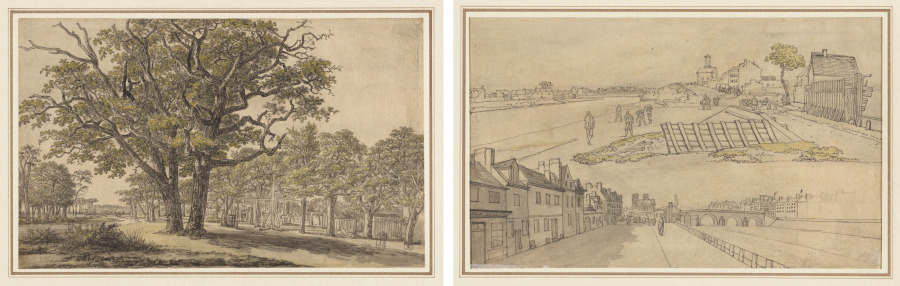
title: Landscape (recto) Two Views of Paris (verso)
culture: France, 19th century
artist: Georges Michel (French, 1763–1843)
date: first half 1800s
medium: pen and black ink, brush and gray and yellow wash, yellow gouache, and black chalk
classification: Drawing